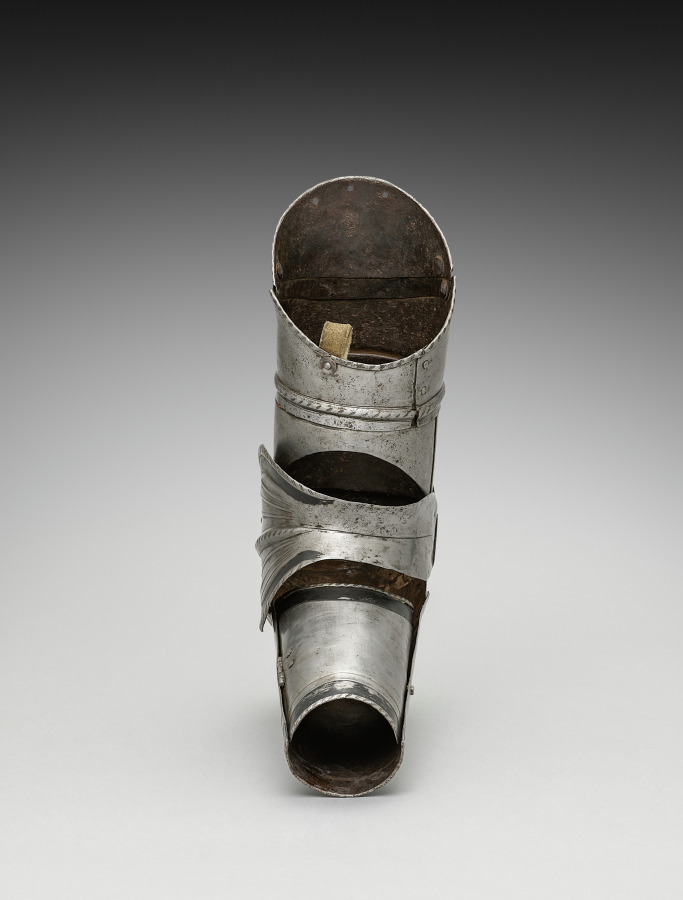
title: Right Vambrace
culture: Germany, 19th century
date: 1801–1900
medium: steel with black paint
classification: Arms and Armor